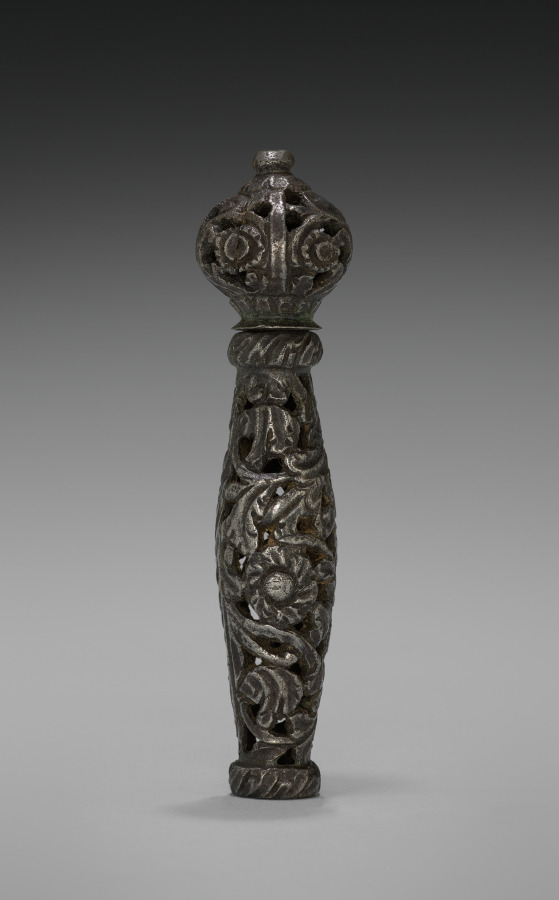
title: Pommel and Grip of Dress Sword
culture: Italy, 17th century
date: 1600s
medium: steel, chiseled, chased, and pierced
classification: Arms and Armor